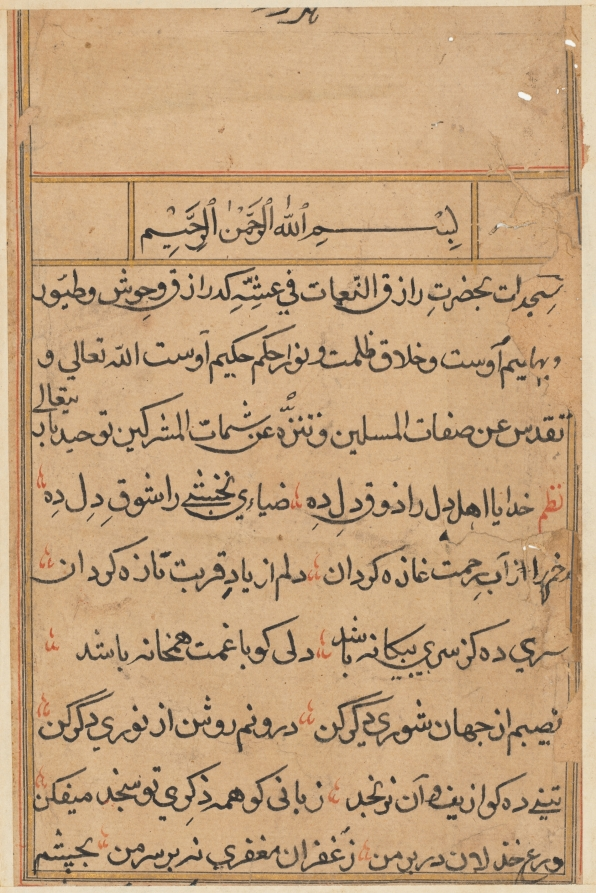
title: Page from Tales of a Parrot (Tuti-nama): text page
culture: Mughal India, court of Akbar (reigned 1556–1605)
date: c. 1560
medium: gum tempera, ink, and gold on paper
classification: Painting